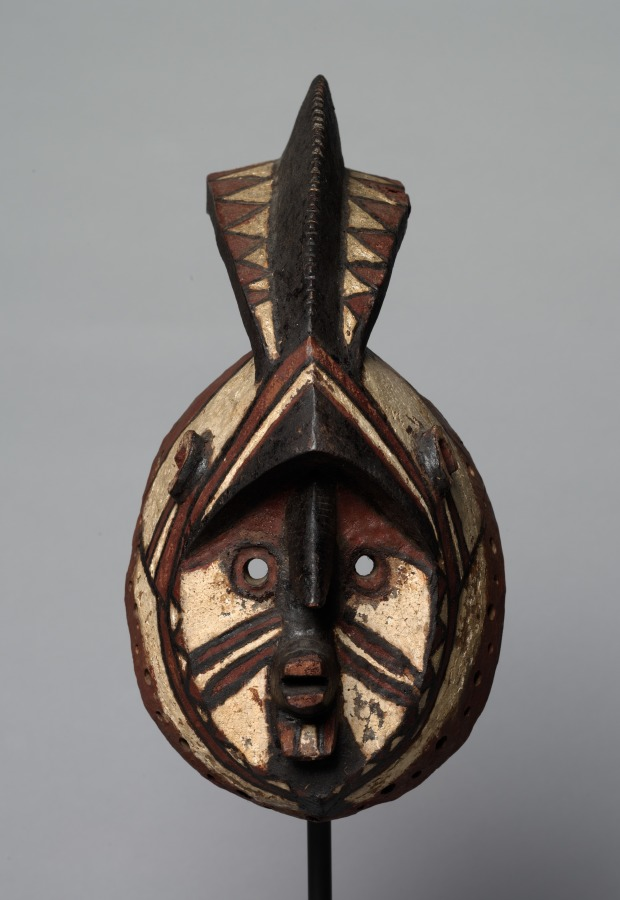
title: Mask (wan-balinga)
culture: Africa, West Africa, Burkina Faso, Mossi-style blacksmith-carver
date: early 1900s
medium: Wood and paint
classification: Mask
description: Only the farmers among the Mossi people employ masks. This mask’s proper name, wan-balinga, evokes a mythical figure who was the mother of the first Mossi ruler. Such masks are most typically worn and danced with on the occasion of the funeral of a male or female elder as escorts of the corpse to the grave. They also appear during annual memorial services that occur months after the actual burial, when all the deceased clan members are commemorated and honored.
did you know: This mask was worn and danced upon the death of an elder, escorting the corpse to the grave.